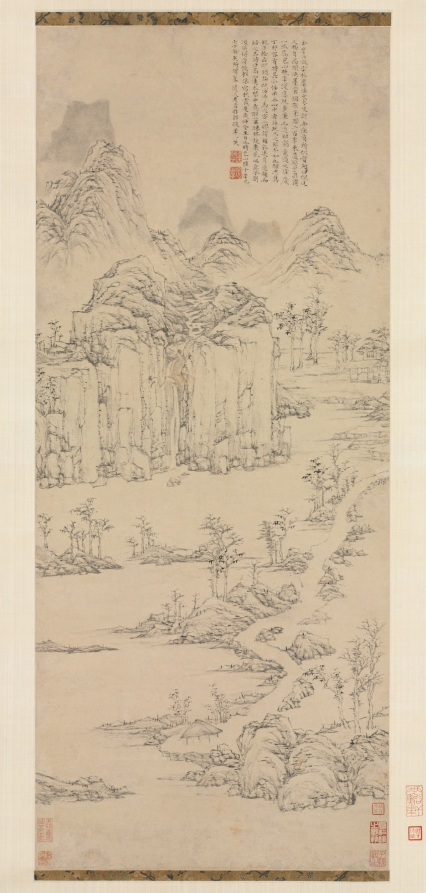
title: Daoist Retreat in Mountain and Stream (Landscape after Ni Zan [1301–1374])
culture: China, Ming dynasty (1368–1644)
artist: Lu Zhi (Chinese, 1496–1576)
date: 1567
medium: hanging scroll; ink on paper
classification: Painting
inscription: Artist's inscription, signature, and 3 seals: In my youthful days I liked to imitate the ink method of Yün-lin [Ni Tsan]. Mr. Wen, the academician [Wen Cheng-ming], remarked that I barely succeeded in achieving some resemblance. He once honored me with the inscription "lofty and imperturbable indeed was the personality of Ni Yü [Ni, the Odd]. Pale ink and blue smoke were formed by his scribbling brush. His surviving works have become so rare in the last two hundred years; only Pao-shan [Lu Chih] carries on his true tradition." In my older years, having to comply with frequent requests for paintings, my brushwork has become stronger than before and I thought to myself that I may have surpassed the Old Master. In the ting-mou year of the Lung-ch'ing era [1567] a friend brought a small painting [by Ni Tsan] and showed it to me in the mountains. I studied and enjoyed it for a long time, then realized that I was actually inferior. This gave me second thoughts about my earlier style, so I selected a piece of old window paper and did this painting in imitation. My friend was kind enough to say that it was truly a quick and close resemblance. I then wrote a colophon and presented the painting to him. My poem says: High mountains and distant waters are the thoughts coming from the lute; The drunken leaves and the sparse woods are merely flowers in the mirror. This idea, I'm sure, will be understood by Tzu-ch'i, one who appreciates my art, It is for him that I have painted on thin paper with light touches, The cloudy color of an autumn evening. This is the winter solstice of the same year. By then, Pao-shan, Mr. Lu, was already over seventy years of age. Could it be that one's brush also gets old together with one's age, as the saying goes. I put down my brush with a laugh. [2 seals] Lu Shu-p'ing shih, Pao-shan tzu. [seal, bottom left corner] Lu Chih shu-p'ing. trans. WKH 6 additional seals of Chu Ching-hou (n.d.).